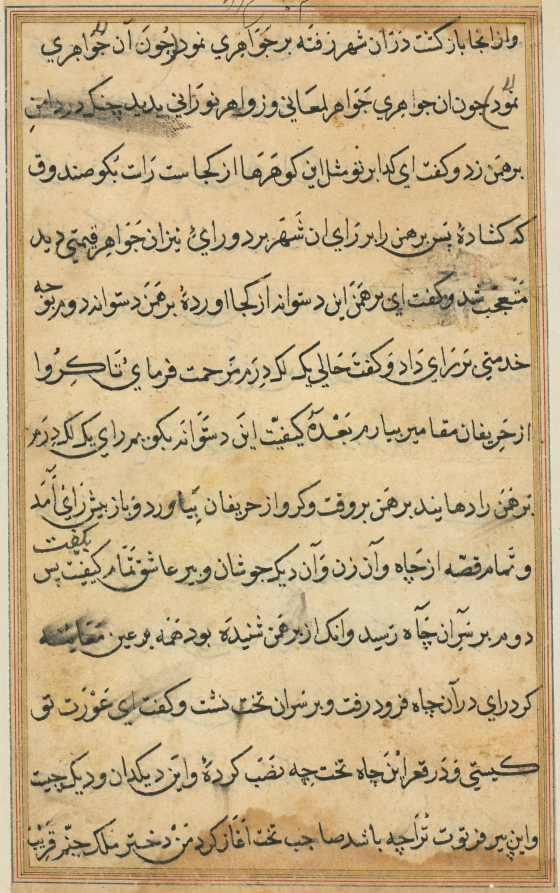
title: Page from Tales of a Parrot (Tuti-nama): text page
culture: Mughal India, court of Akbar (reigned 1556–1605)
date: c. 1560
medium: gum tempera, ink, and gold on paper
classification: Painting